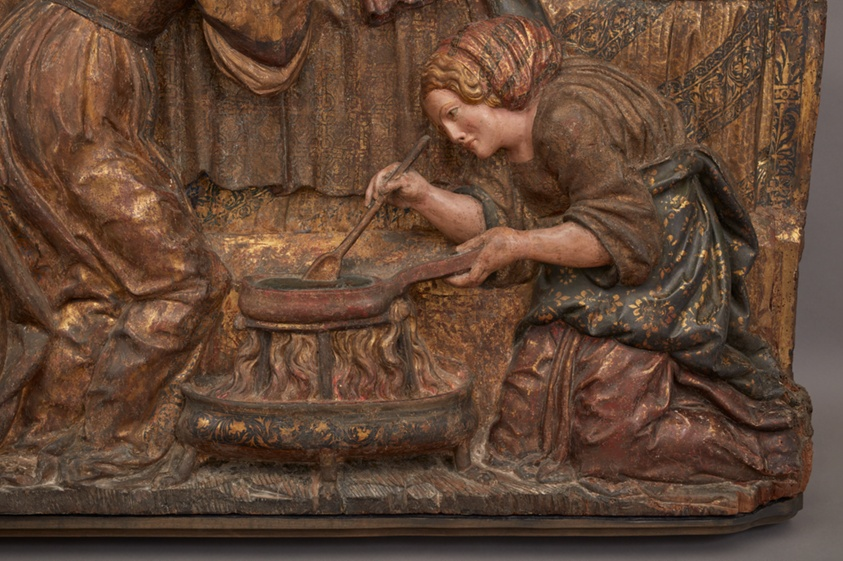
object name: Sculpture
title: The Birth of Saint John the Baptist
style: sixteenth century, 16th Century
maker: Artist unknown (Spanish (Burgos), active 16th century)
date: c. 1525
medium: Wood, polychromy, and gilding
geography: Spain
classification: relief; sculpture; sculpture/wood; spanish; wood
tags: religious scenes, bed, fire, women, woman, babies, birth, Christianity, Christian subjects, Saint John the Baptist, saints, religious figures, religious, religion